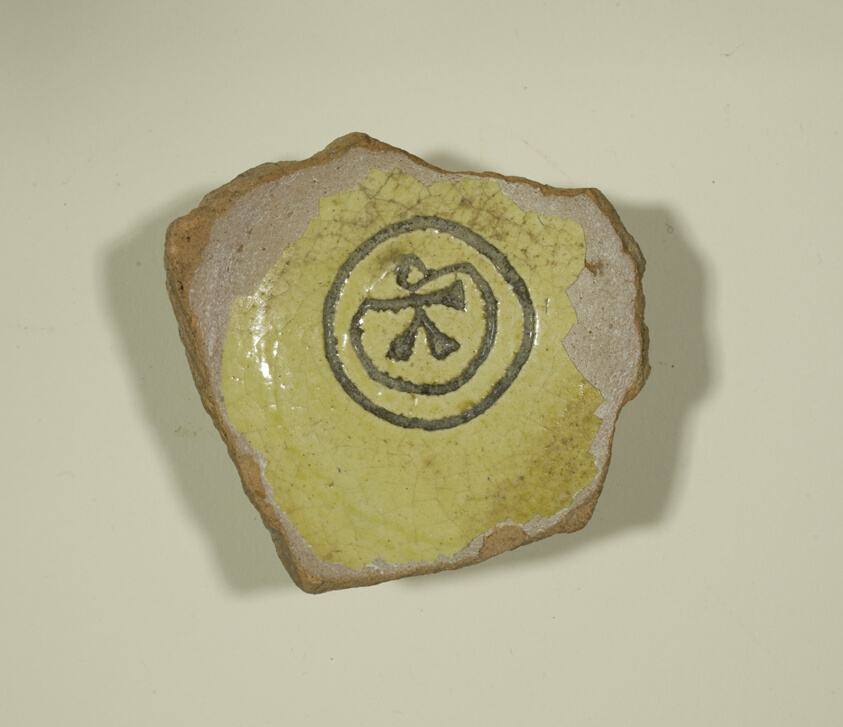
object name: Decorative Arts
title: Fragment from the Base of a Bowl with "K" Monogram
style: byzantine, european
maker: Byzantine; Constantinople or vicinity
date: 13th-14th century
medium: Glazed terracotta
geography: Istanbul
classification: fragment; ceramics; vessel; bowl; asian art; decorative arts